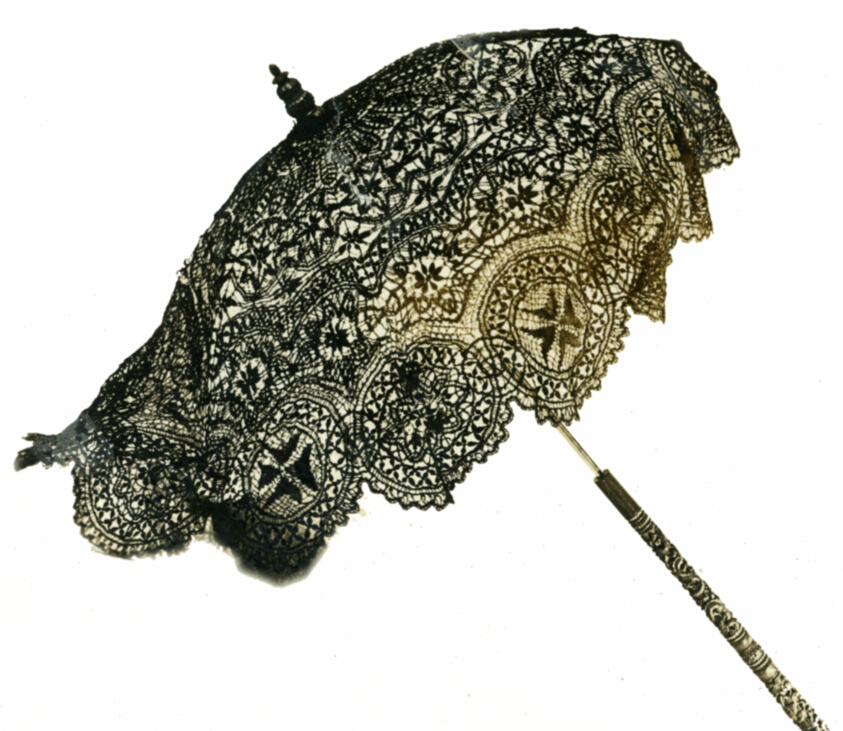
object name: Textile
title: Parasol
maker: France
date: 1866/70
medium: Black silk maltese lace over white taffeta; lined with black silk; handle, Chinese carved wood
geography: France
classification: textile; parasol - lace; costume accessory - parasol